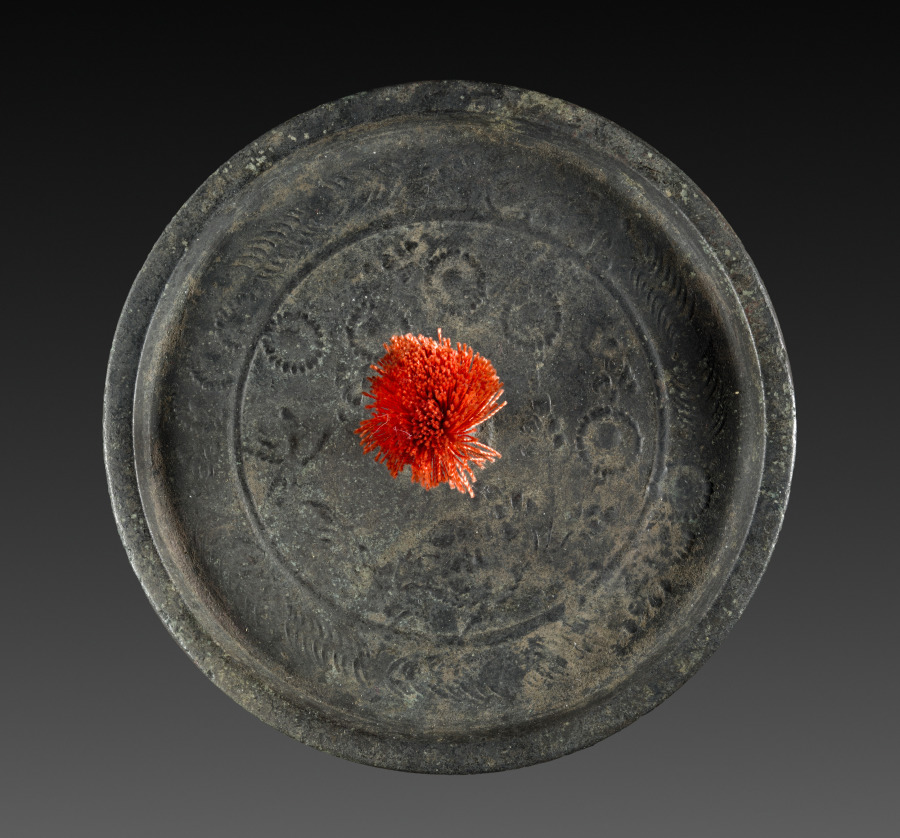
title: Mirror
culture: Japan, Heian period (794–1185)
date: 794–1185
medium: bronze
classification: Metalwork